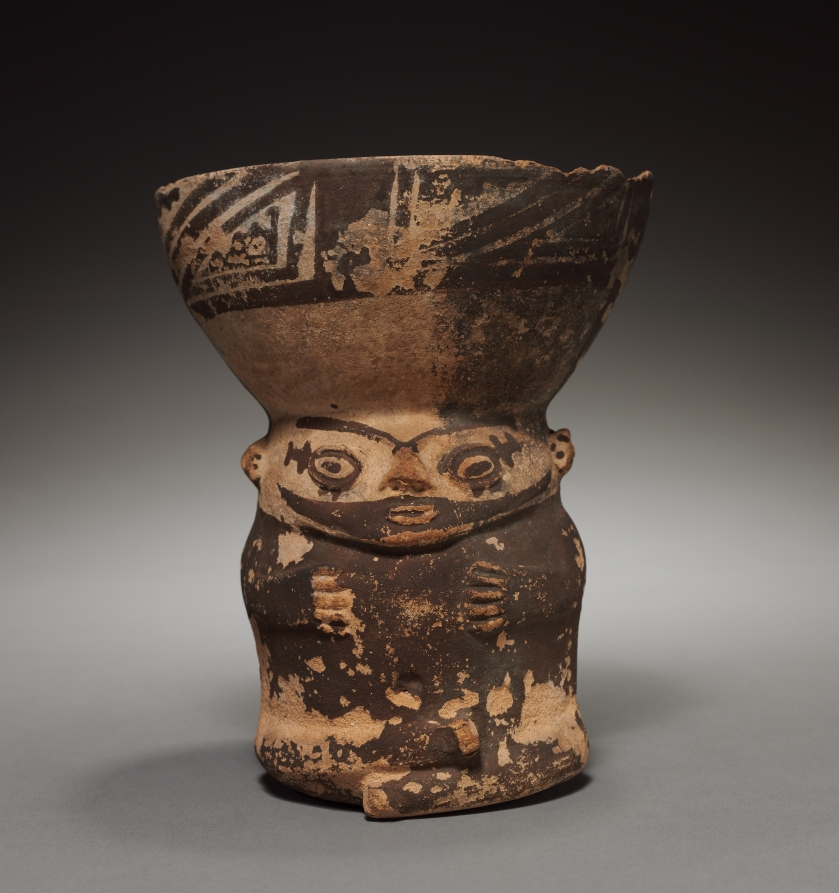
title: Bottle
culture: Peru, Pachacamac, 9th-12th Century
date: 800–1150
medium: pottery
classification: Ceramic